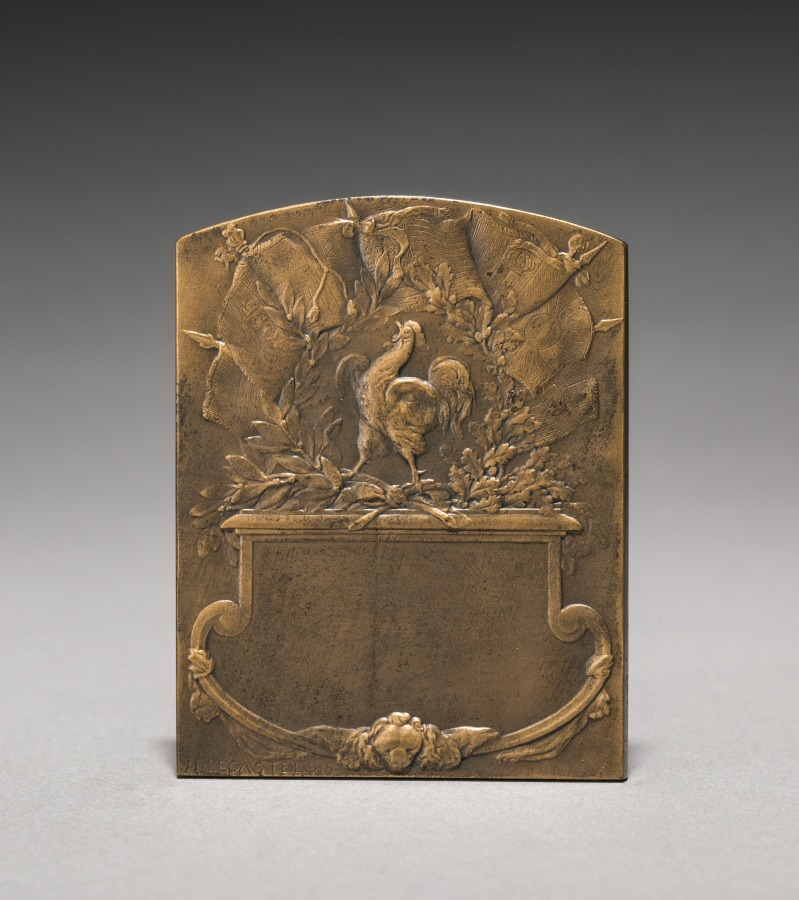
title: Medallion (reverse)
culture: France, 19th-20th century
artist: Jules Prosper Legastelois (French, 1855–1931)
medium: bronze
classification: Metalwork